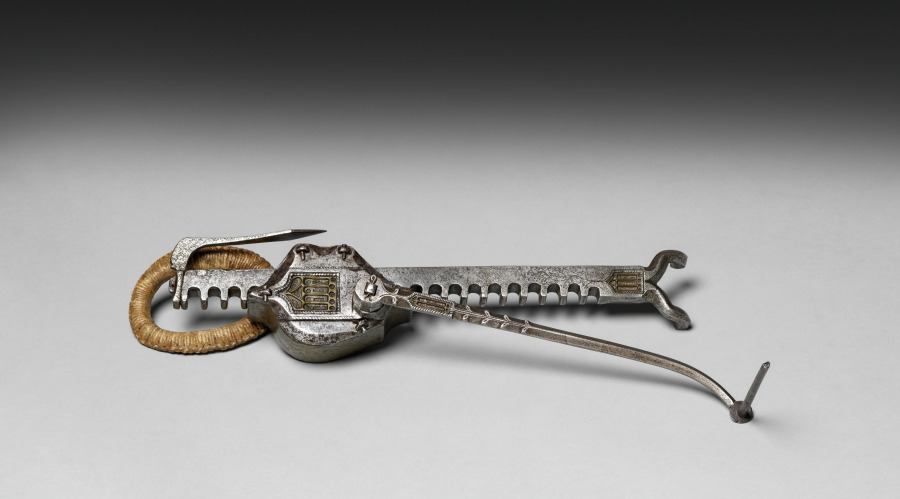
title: Cranequin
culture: France(?)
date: c. 1480–1500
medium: steel and brass; incised decoration; pierced traceried Gothic windows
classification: Arms and Armor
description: Bows made of composite materials were developed during the 1400s. They were immensely powerful and could be spanned only with the aid of a winder called a cranequin like the one seen here.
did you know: The mark, made of inlaid copper, is currently unidentified.